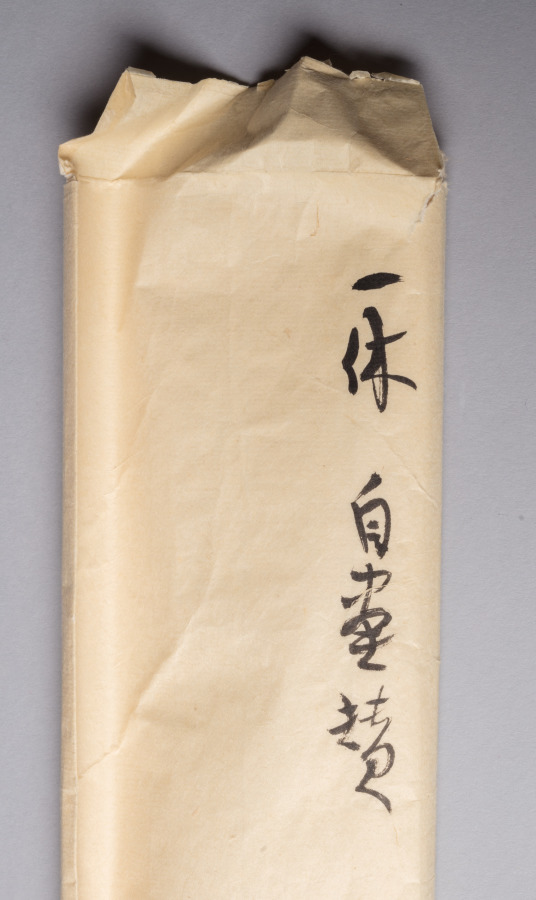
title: Calligraphy with Willow and Swallows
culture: Japan, Muromachi period (1392–1573)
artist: Ikkyū Sōjun (Japanese, 1394–1481)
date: 1400s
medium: hanging scroll, ink on paper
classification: Painting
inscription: How many days has it rid itself of the crow’s cloth? It knows not!/ Lovely is its body so nimble and neat./ Neither men of wealth, courtly position, or power can come close to the unfettered, noble swallow!/ With the coming of spring, it seems to be flying about, dancing around the grass hut of the foolish Priest. signed: Unkasō Isshi Tōkai jun Ikkyū shi ga ippitsu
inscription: outer box inscribed: Ikkyū Ōshō Enshi-zu Jigasan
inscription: inner box side lid inscribed: Showa 50 (1975), November by Tayama Honan with kao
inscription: Inner box side lid inscribed: Ikkyū Ōshō Bokuseki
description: The famed Buddhist monk Ikkyū is best remembered for his calligraphy. Calligraphic conventions of his time called for brushwork that did not vary much in style from character to character. However, as Ikkyū’s lines progress, his brushwork wanders between standard script and a sort of shorthand, marked by an uneven distribution of ink and a reduction of the characters to only the most necessary strokes. Ikkyū’s direct communication of emotion via brushwork became characteristic of the works produced by monks affiliated with the temple Daitokuji later in the Edo period (1615–1868).